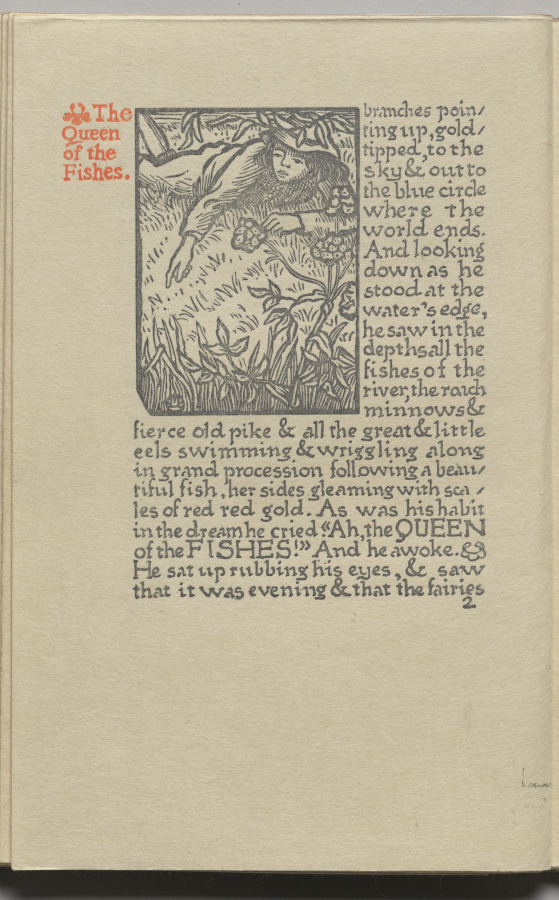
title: The Queen of the Fishes: Plate 2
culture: England, 19th century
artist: Lucien Pissarro (British, 1863–1944)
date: 1894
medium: woodcut printed in gray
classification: Bound Volume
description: Pissarro, son of the French Impressionist artist Camille Pissarro, moved to England in 1890. By 1894 he and his wife, Esther Bensusan Pissarro, had bought a printing press and established the Eragny Press. Influenced by William Morris, they were involved in every step of the production process: designing, cutting the woodblocks, setting type, and printing. The first book published by Ergany Press, The Queen of the Fishes, is based on an old fairy tale in which a peasant boy and girl escape the hardships of their lives by fantasizing that they have been turned into a giant oak and a splendid fish, respectively.